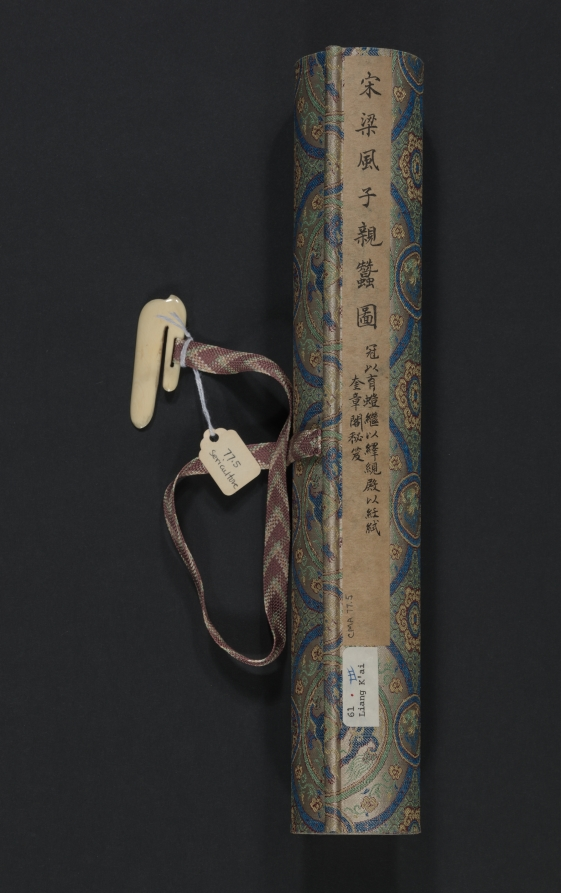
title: Sericulture (The Process of Making Silk)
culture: China, Southern Song dynasty (1127-1279)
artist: attributed to Liang Kai (Chinese, mid-1100s–early 1200s)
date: early 1200s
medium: Handscroll; ink and color on silk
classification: Painting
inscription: 3 colophons and 7 seals of Ch'eng Ch'i (20th c.).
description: By the Southern Song period, the economic center of the silk industry had shifted to the lower Yangzi delta, while the north continued to be troubled by wars. Divided into three sections, the handscroll illustrates 14 steps in the process of making silk, from the raising of silkworms to the weaving of silk cloth. The scroll’s scenes follow the illustrations of Lou Shou’s (1090–1162) Pictures of Tilling and Weaving (gengzhi tu), the first recorded painting of this genre, which was conceived in Hangzhou around 1145. However, in the Cleveland painting the artist groups several scenes of sericulture together under the roof of an open structure.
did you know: The painting is attributed to Liang Kai, a court artist active from about 1201 to 1204 at the Imperial Painting Academy in the city of Hangzhou, a major silk weaving center from that time to the present day.